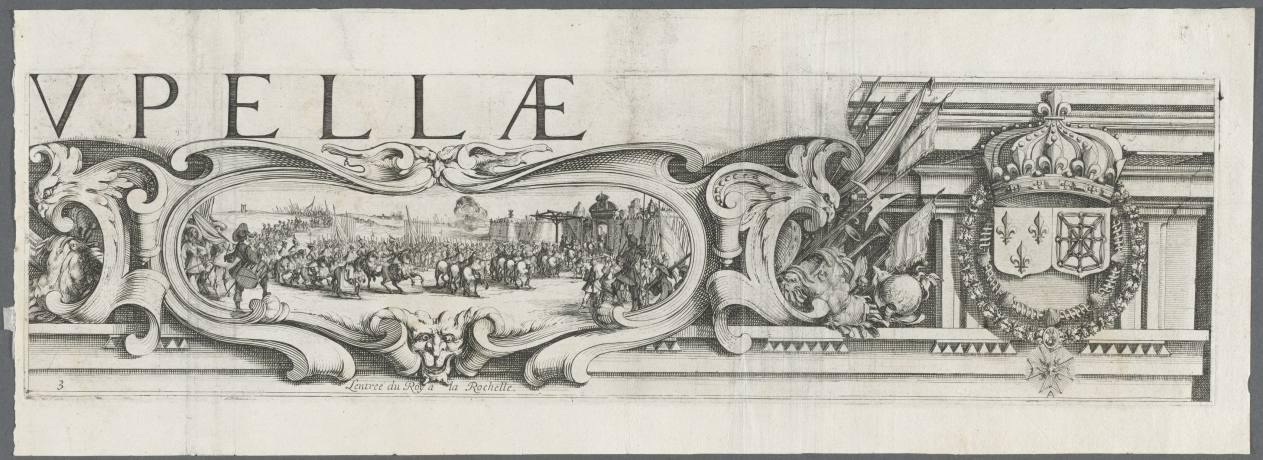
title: The Siege of La Rochelle: Plate 3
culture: France, 17th century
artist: Jacques Callot (French, 1592–1635)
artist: and Abraham Bosse (French, 1602–1676)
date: 1628–1630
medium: etching and engraving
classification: Print